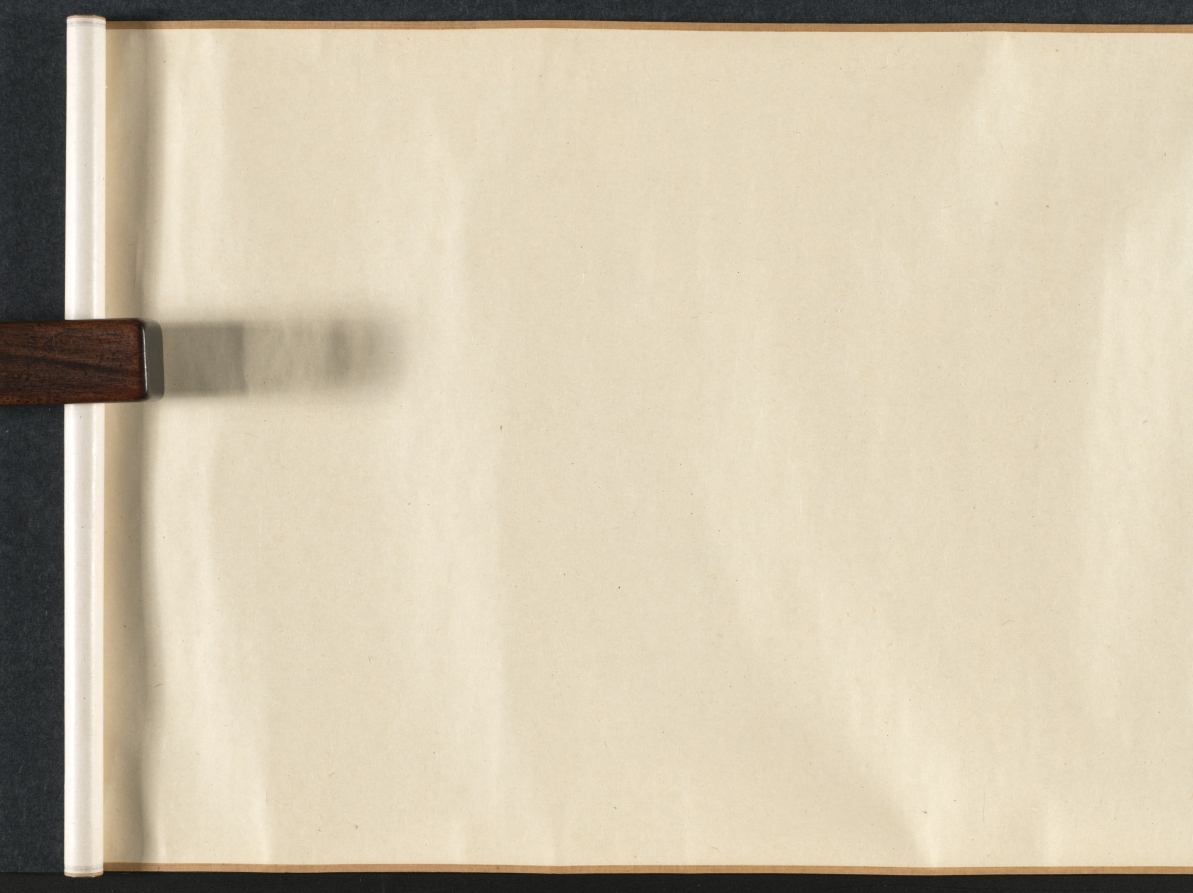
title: Landscape with Bamboo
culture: China, Yuan dynasty (1271-1368)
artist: Song Ke (Chinese, 1327–1387)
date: 1300s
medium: Handscroll; ink on paper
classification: Painting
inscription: 東吳宋克戲為仲幾畏友圖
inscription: 2 colophons and 14 additional seals: 1 seal of Yü Chung-chi (14th c.); 1 seal of Wu Ch'eng (1469 jinshi); 1 colophon and 2 seals of Wu K'uan (1435–1504); 1 colophon and 9 seals of Cheng Qi (1911–1988); 1 seal unidentified.